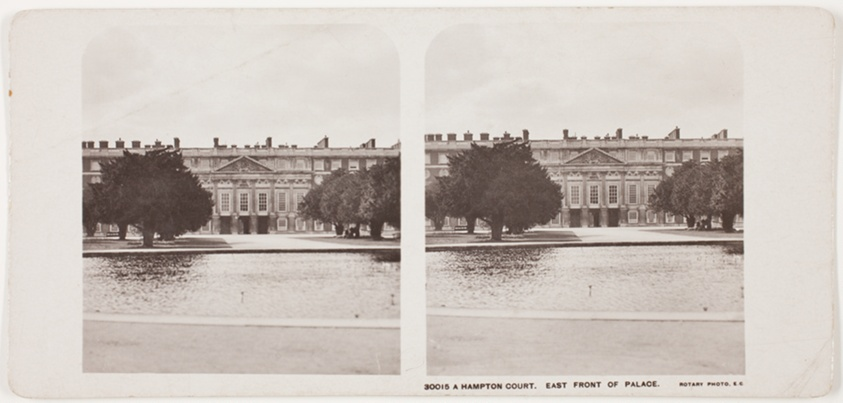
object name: Photograph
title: Hampton Court, East Front of Palace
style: 19th century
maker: Artist unknown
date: 1860s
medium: Albumen print, stereo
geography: Hampton Court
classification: photograph; albumen silver print; photography